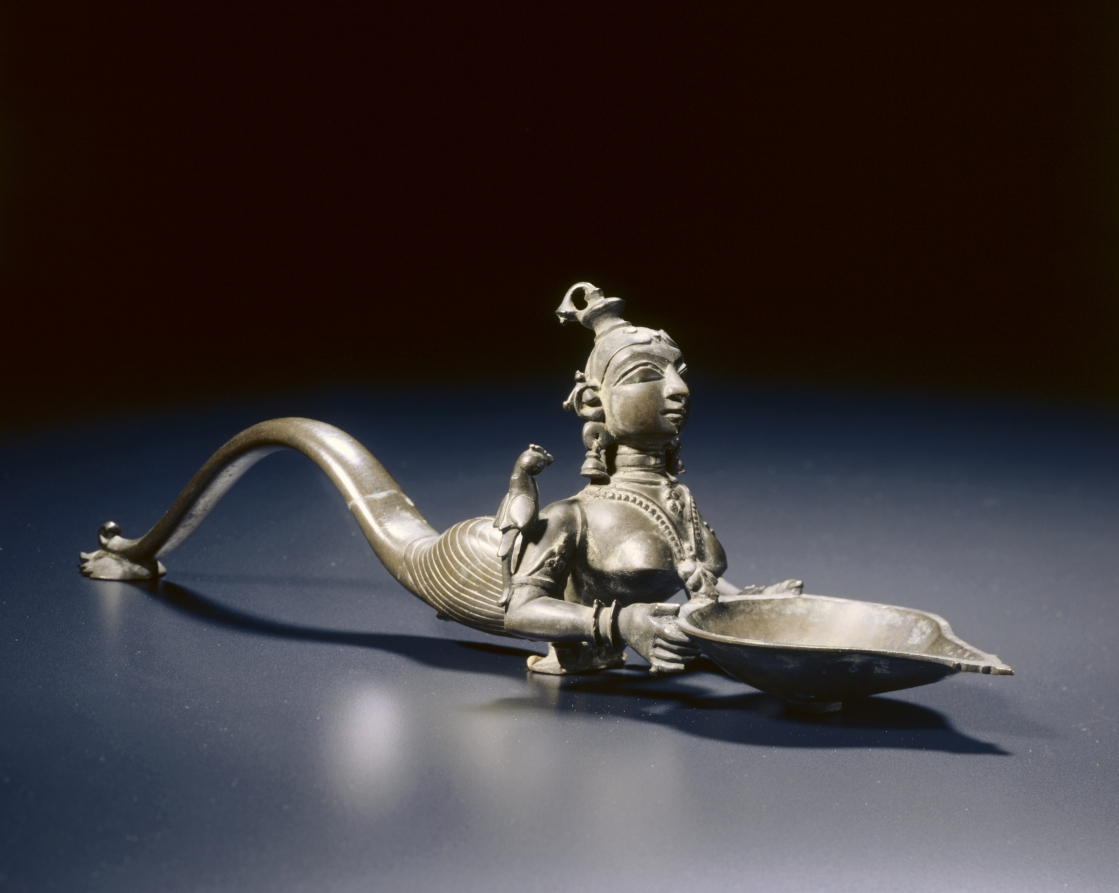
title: Votive Lamp (Deepa Lakshmi)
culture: South India, Chingleput district (Madras), 18th-19th Century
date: 1700s-1800s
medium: bronze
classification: Sculpture